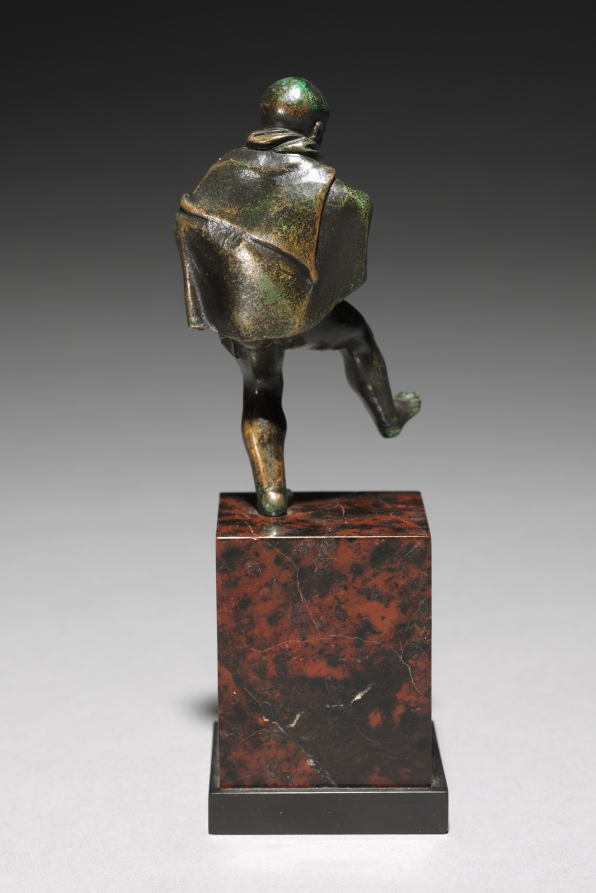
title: Dancing Boy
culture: Northern Italy, early 16th century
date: c. 1500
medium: bronze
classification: Sculpture